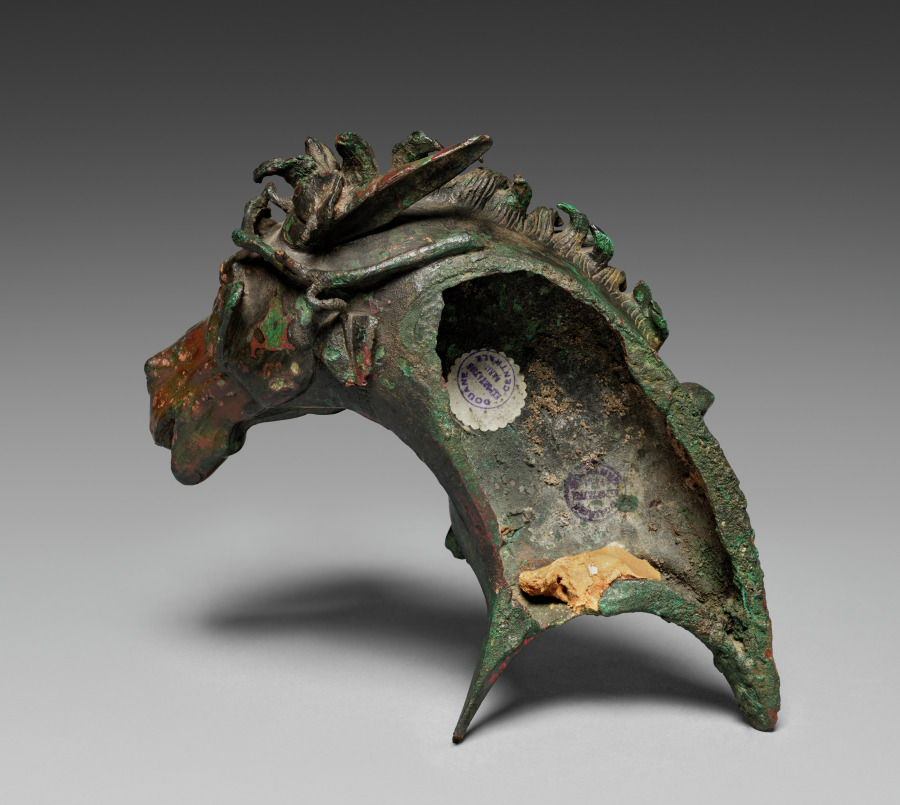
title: Mule-Head Attachment for a Couch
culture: Greece, Hellenistic period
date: 200–100 BCE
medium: bronze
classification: Sculpture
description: This bronze attachment in the shape of a mule’s head was once part of a fulcrum (armrest) for a banqueting couch. The mule’s mane flies upward, its mouth open and its ears pushed back against its head. The mule wears an ivy garland and a saddlecloth made from panther skin, two elements associated with the wine god Dionysos.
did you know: The pattern on the panther skin, called a meander, was also extremely popular on Greek pottery.